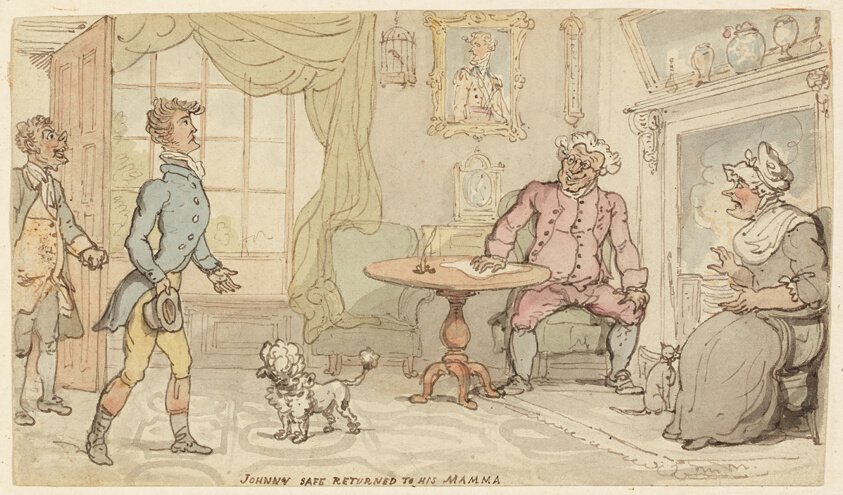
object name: Drawing and Watercolor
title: Johnny Safe Returned to His Mamma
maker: Thomas Rowlandson (English, 1756-1827)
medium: Watercolor on paper (removed from book)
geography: England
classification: watercolor; drawings (visual works); prints and drawing